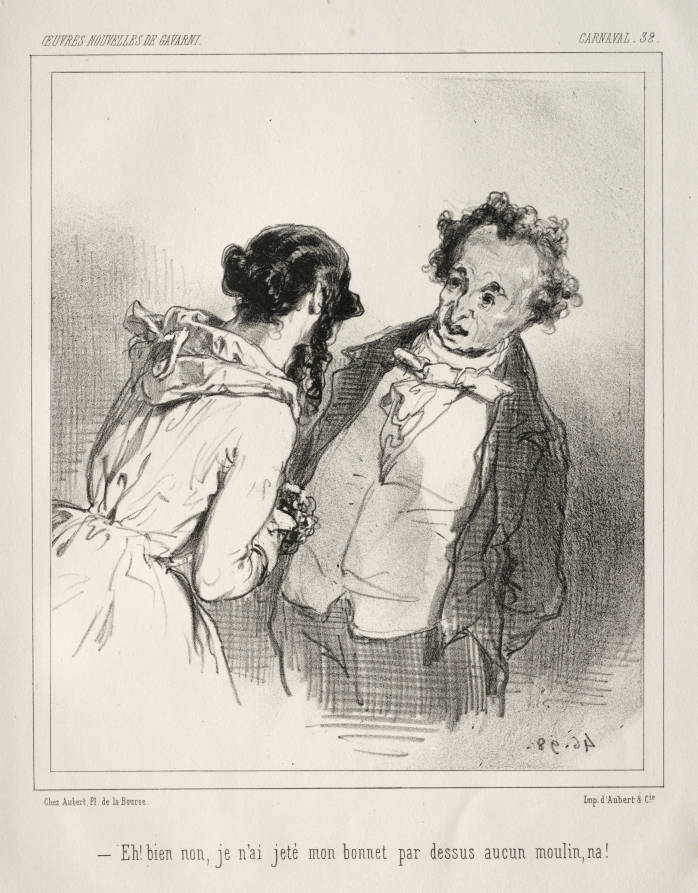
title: Carnaval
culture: France, 19th century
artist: Paul Gavarni (French, 1804–1866)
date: c. 1841–47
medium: lithograph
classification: Print